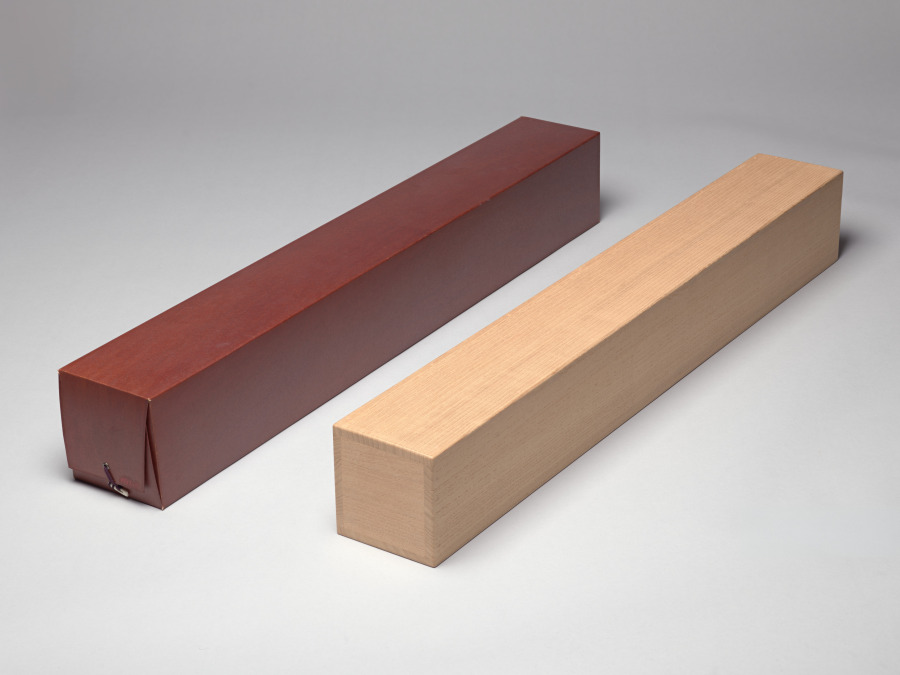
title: Snow Landscape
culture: Japan, Edo period (1615–1868)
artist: Yosa Buson (Japanese, 1716–1783)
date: mid-1770s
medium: hanging scroll; ink and color on paper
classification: Painting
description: In this painting, the mountains and sky glow with a hidden warmth from undertones in red as birds descend into the trees around a scholar’s retreat. Yosa Buson is recognized in Japanese literary history as one of the country’s greatest poets, but he was also an accomplished, self-taught painter. His style changed over the course of his career. Initially painting with precise brushwork, he gradually developed a freer style like the one he used in this snowscape.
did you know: One of the artist's seals reads: "flung ink gives life to brush lines."